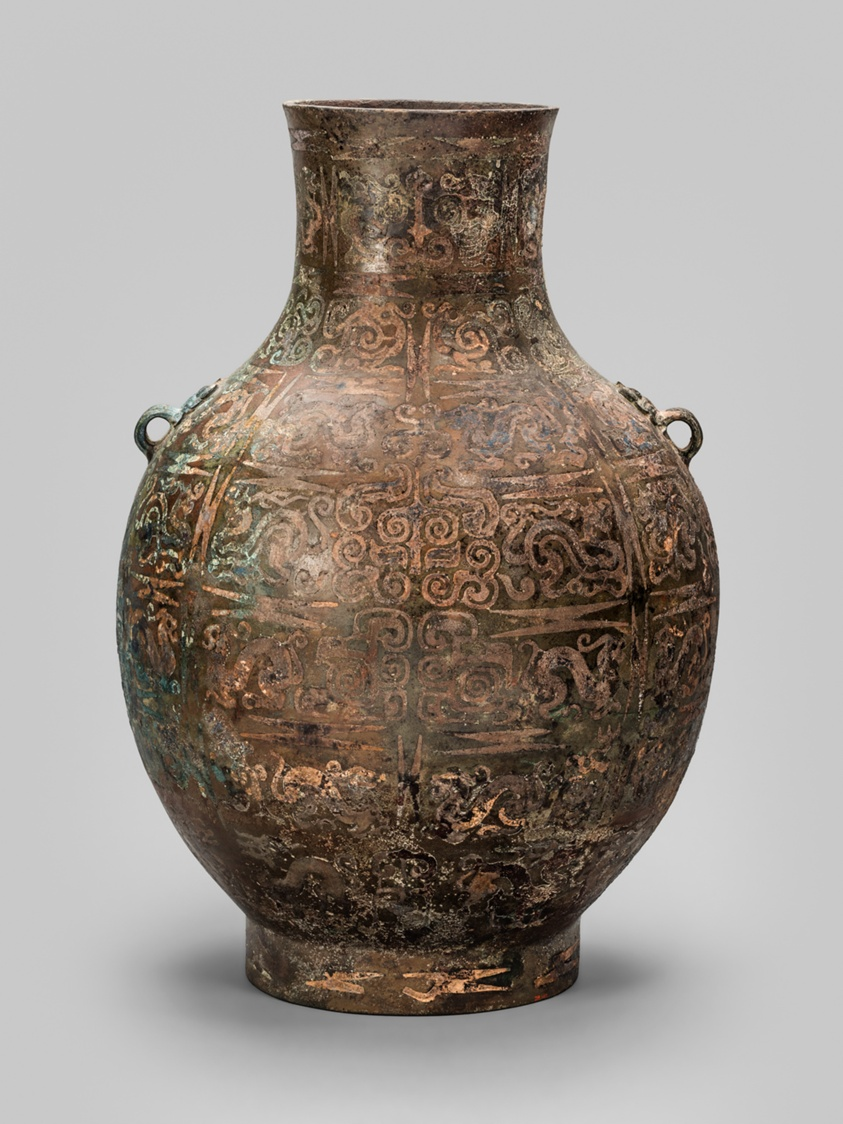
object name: Vessel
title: Jar (hu)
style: Chinese (culture or style)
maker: China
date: Eastern Zhou dynasty, Warring States period (475–221 B.C.)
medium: Bronze inlaid with copper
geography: China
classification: bronze; metal; vessel; asian art